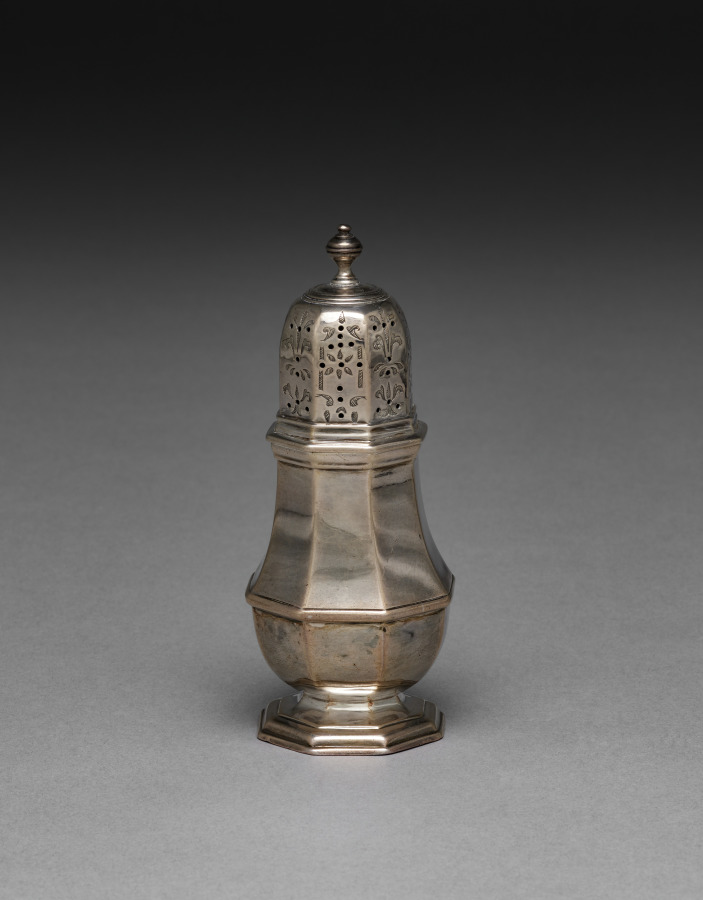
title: Caster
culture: England, London, 18th century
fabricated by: William Spackman (British)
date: 1719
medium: silver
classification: Silver